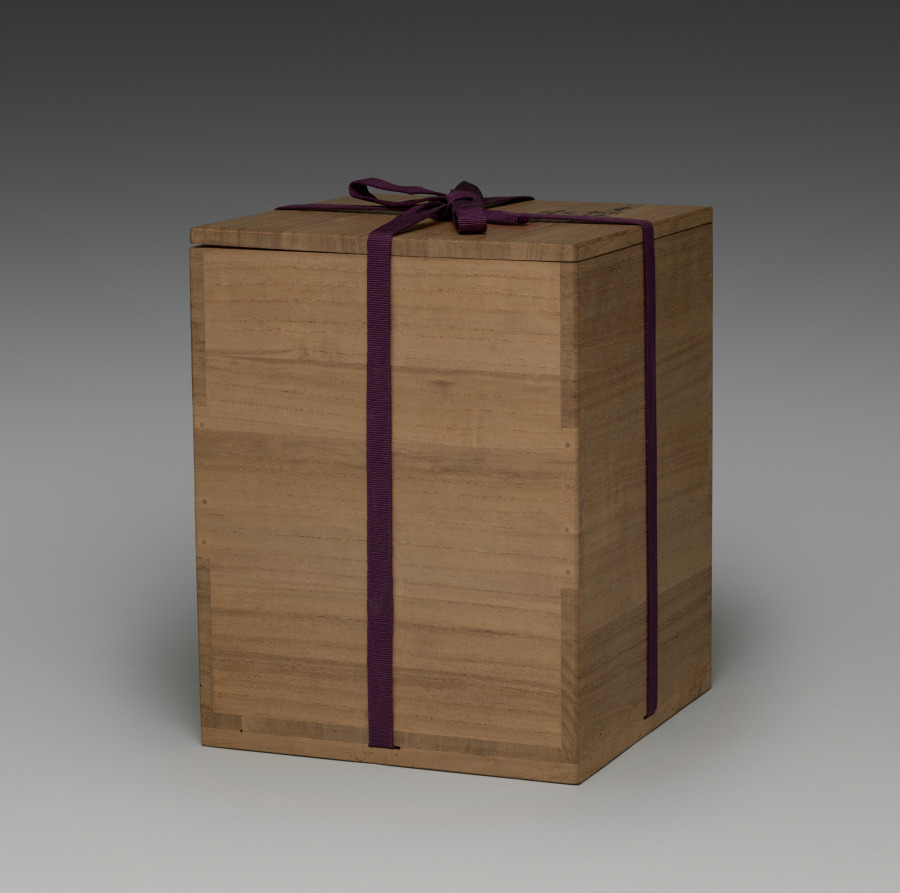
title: Water Container with Peonies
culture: Japan, Meiji period (1868–1912)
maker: Seifū Yohei III (Japanese, 1851–1914)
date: 1900–1914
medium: Porcelain with molded and carved design, green glaze, and black lacquered lid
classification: Ceramic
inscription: 清風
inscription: 帝室技芸員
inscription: 清風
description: This ceramic is an especially accomplished example of Yohei III’s combination of an allover translucent colored glaze with molded and carved designs. It features the peony as its primary motif. The water container, or mizusashi, has a green glaze, and its design takes into consideration the rounded shape and the seated position of the host and guests. It begins low on the body with a flower just beginning to open and continues with another flower a bit higher up, with its petals fully extended and beginning to open outward. It finishes with a flower in full bloom, petals and leaves unfurled and spread outward from the center, now occupying almost the entire surface. The water container once belonged to the Hosokawa family, whose go-between corresponded with Yohei IV about the piece. Yohei IV thanked them for their payment and requested that despite his father’s death in the previous year, they continue to favor the studio with their orders. The letter and its envelope, as well as an auction tag, remain with the object.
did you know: This water container may also serve as a site for cultural reckoning, as when the life cycle of a flower prized in East Asia as a symbol of wealth is displayed across a Japanese chanoyu vessel whose glaze is associated with the seats of power in China and Korea.